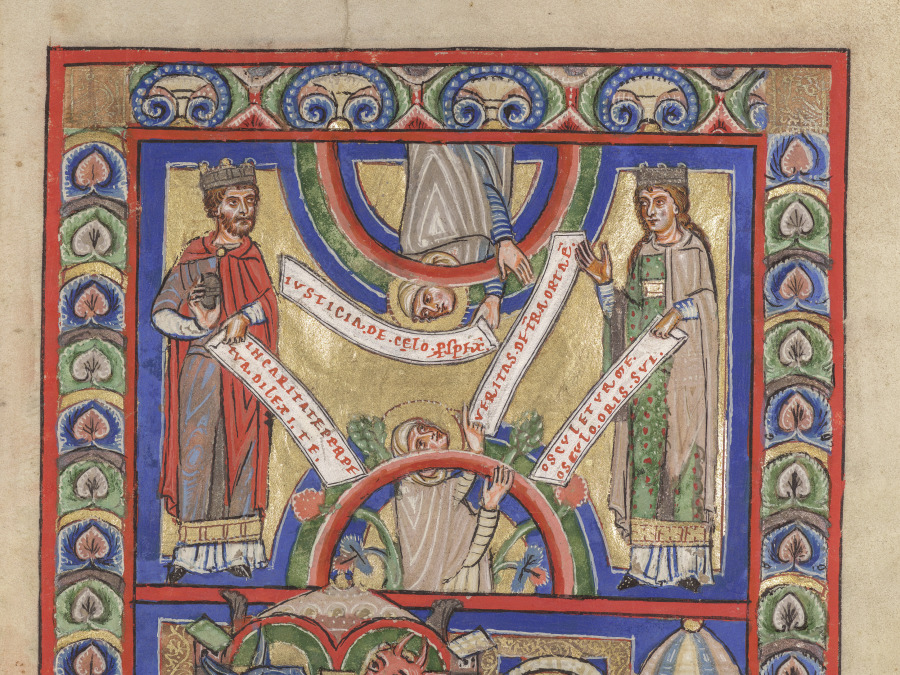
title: Single Leaf Excised from a Gospel Book: The Nativity (recto)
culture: Germany, Helmarshausen Abbey, 12th century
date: c. 1190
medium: ink, tempera, silver, and gold on vellum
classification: Manuscript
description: This leaf comes from a volume that is preserved in the Trier Cathedral Library in Germany (Codex 142).